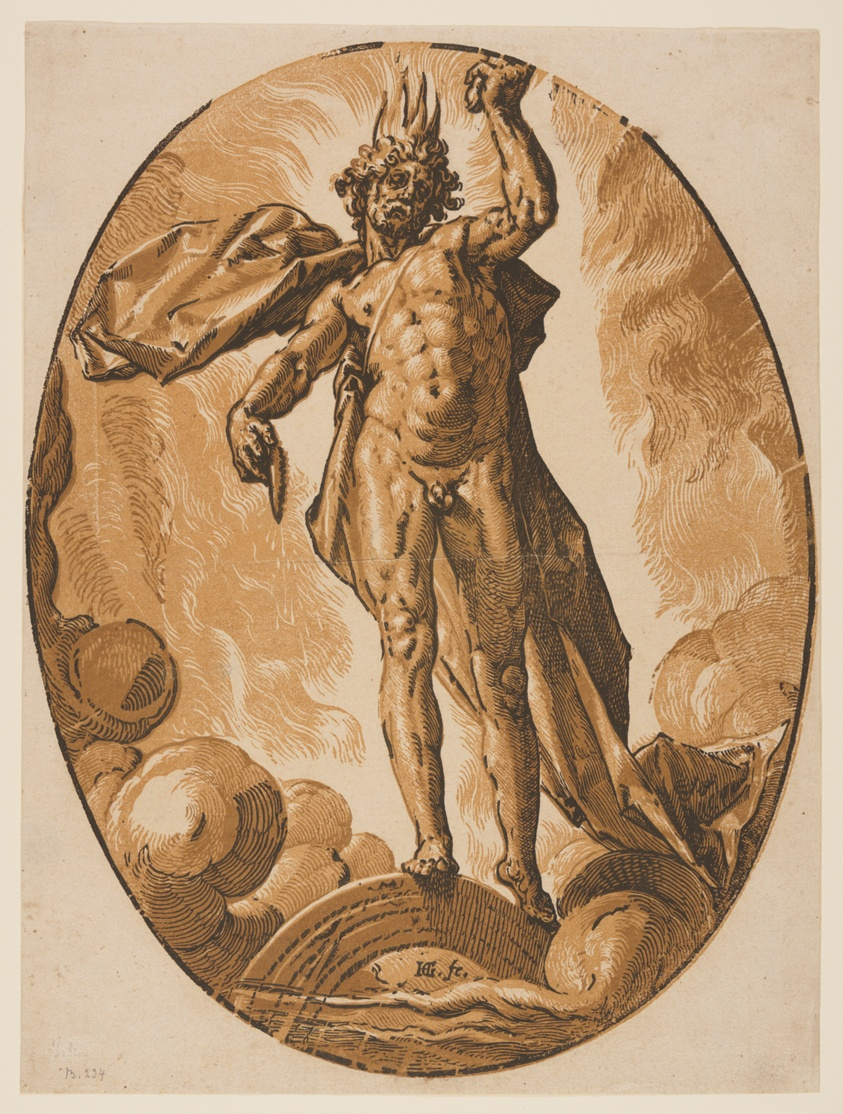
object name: Print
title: Helios, from The Deities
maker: Hendrick Goltzius (Dutch, 1558–1617)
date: 1588/90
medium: Chiaroscuro woodcut from three blocks in ochre and brown on ivory laid paper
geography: Netherlands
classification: print; paper; prints and drawing; woodcut